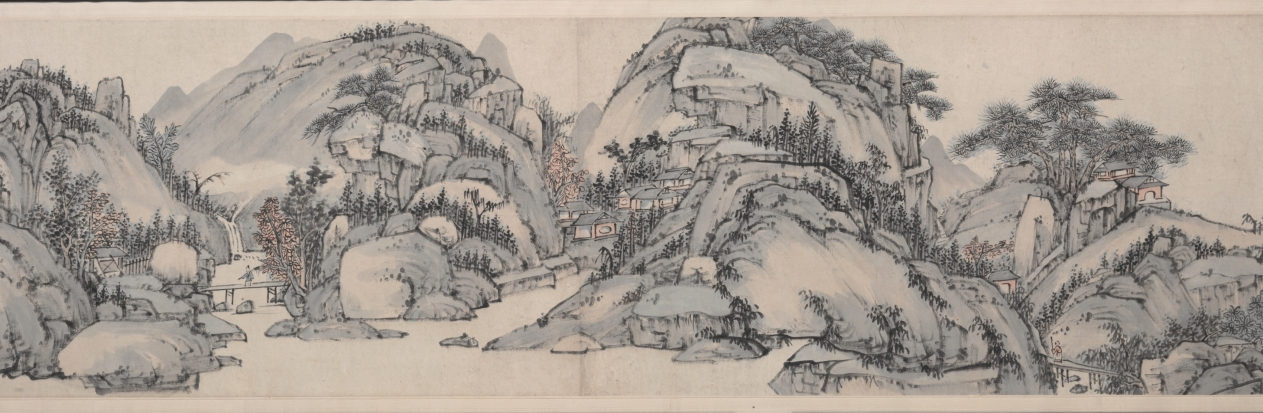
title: Pure Tones among Hills and Waters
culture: China, Qing dynasty (1644-1911)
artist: Xiao Yuncong (Chinese, 1596–1673)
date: 1664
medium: Handscroll; ink and light color on paper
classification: Painting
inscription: 種松發秀色，具是高人心。/ 鑿石築茅屋，長年覆綠陰。/ 白雲無意出，舒卷趨空林。/ 萬籟時一寂，微風墮清音。/ 此情莫可擬，此景誰能論。/ 只向千峰裏，共彈五絃琴。/ 桃花依綠水，不覺又春深。 甲辰花朝題于青蓮閣, 鐘山老人蕭雲從。[印] 鐘山老人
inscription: Title and inscription, dated 1744, and 3 seals of Shen Feng 沈鳳 (1685-1755).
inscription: 4 colophons and 24 additional seals: 1 colophon, dated 1811, and 5 seals of Xiang Yuan 項源 (active about 1811); 1 colophon, dated 1858, and 2 seals of Qi Junzao 祁寯藻 (1793-1866); 1 colophon and 4 seals of Zhang Yunzhong 張允中 (1881–1960?); 4 seals of Jiang Xun 江恂 (active about 1753–after 1780); 1 colophon dated 1943, and 2 seals of Wang Shaoming 汪兆銘 (Wang Jingwei 汪精衛, 1883–1944); 1 seal of Qi Zhiliu 祁之鏐 (active about 1858); 2 seals of Yu Zhimeng 俞芷盟 (second half of 19th century); 4 seals unidentified.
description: Painted at age 68, this landscape is one of Xiao Yuncong’s most mature works. Extraordinary in its combination of fine details with bold brushstrokes and bluish washes, it is also one of his longest compositions in handscroll format, extending over 23 feet. Throughout his lifetime, Xiao visited Nanjing and Yangzhou, where he met with other painters and literati. Regarded as the founder of the Gushu school (姑孰派) of painting, Xiao painted from nature, and his landscapes are informed by his travels, as well as by his experience as a print designer.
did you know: Biographical notes on Xiao Yuncong relate that he did not pursue the career of an official, but "furnished a cottage in the eastern suburbs [of Wuhu in Anhui province] and amused himself playing the qin (zither) and reading every day."